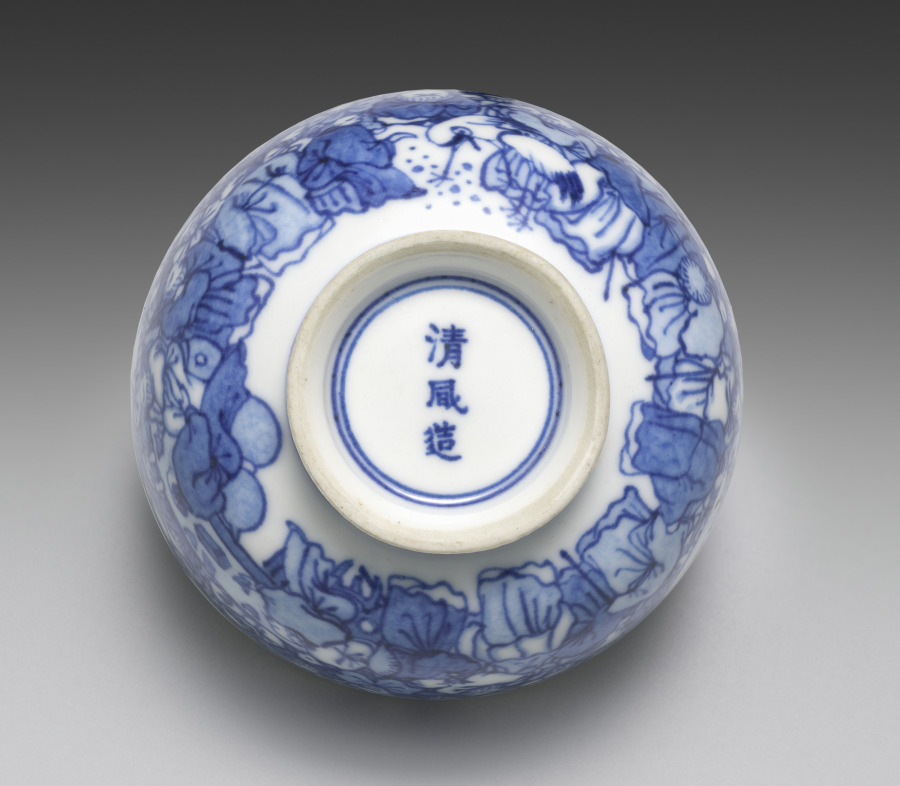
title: Teacup from Teacups with a Hundred Sages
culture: Japan, Meiji period (1868–1912)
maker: Seifū Yohei III (Japanese, 1851–1914)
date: 1893–1914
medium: One from a set of five teacups; porcelain with underglaze blue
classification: Ceramic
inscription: 清風造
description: Each of these five teacups has a painting of identical design in underglaze blue, but as the tiny figures are drawn entirely by hand, each cup has its own personality. The theme of the sencha cups is an assembly of sages or immortals, literally “a hundred venerable [people]” (hyakurō). The myriad figures crowd the scene in groups. The god of longevity, with his tall forehead, sits with his cranes, having flown in from Mt. Penglai on the Isle of the Immortals. Seven long-bearded sages sit around a stone table, chatting and drinking; one is seated on an enormous gourd. Of course, there is a stack of books on the table, and elsewhere, scrolls are being written upon or read—in one case held very close by a sage who is wearing glasses. The design was enormously popular in ceramics made for those engaged in literati culture.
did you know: Seifū Yohei III (1851–1914) produced many works for tea gatherings where people drank Chinese-style leaf-tea (sencha).